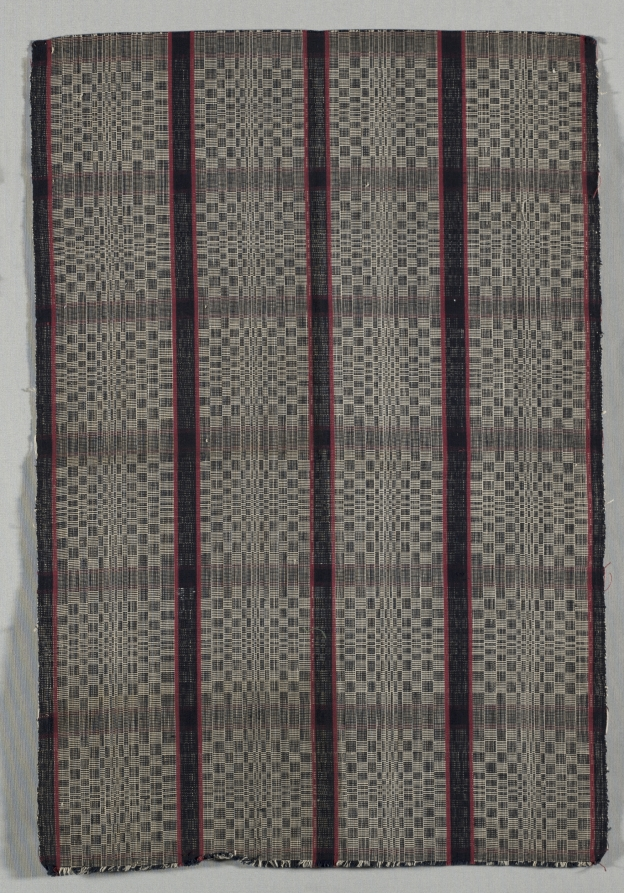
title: Textile fragment (Binakol)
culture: Philippines, Ilokos, Norte Province, Luzon, 20th century(?)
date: c. early 1900s(?)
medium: woven cotton; extended tabby weave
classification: Textile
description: This intricate, hand-woven textile was likely produced on a back-strap or upright loom. The binakol block pattern creates a strong optical effect, organized in vertical registers separated by broad, dark stripes with narrow, red accents. The central design is a variant of the whirlpool motif known as kusikos, in which alternating light and dark squares appear to spiral or recede.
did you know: The swirling kusikos pattern was meant to confuse evil spirits and had a protective function.